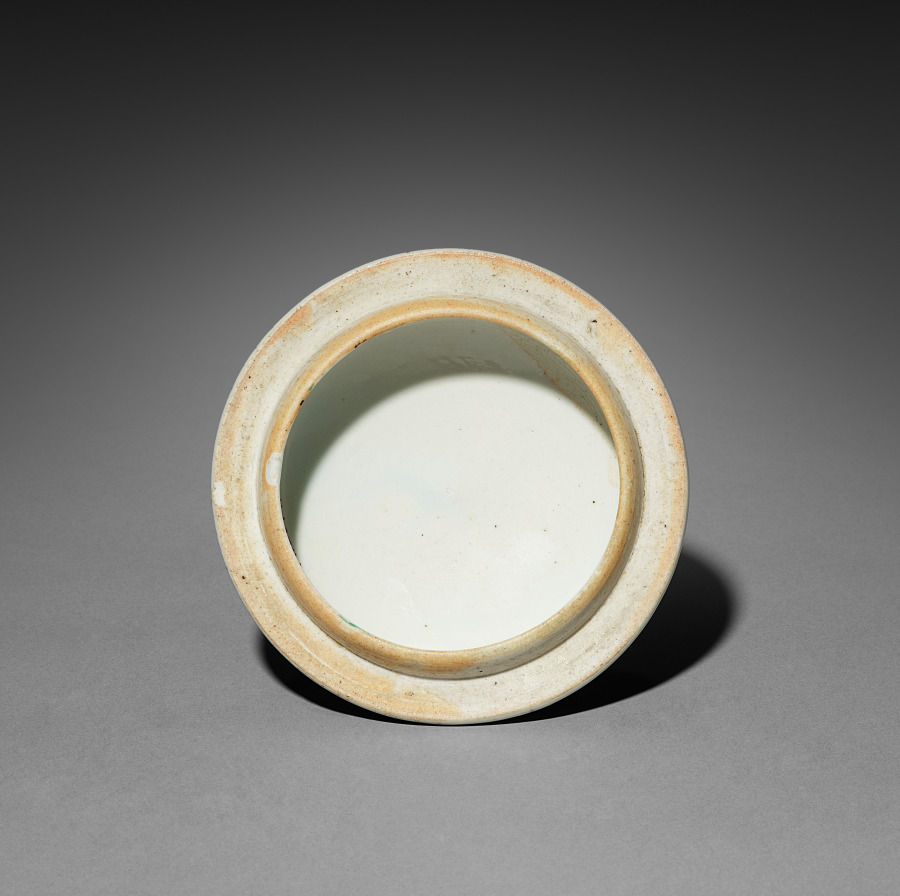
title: Covered Jar with Chrysanthemums, Peonies, and Plum (lid)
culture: Japan, Edo period (1615–1868)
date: late 1600s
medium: porcelain with underglaze blue and overglaze color enamel (Hizen ware, Kakiemon type)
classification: Ceramic